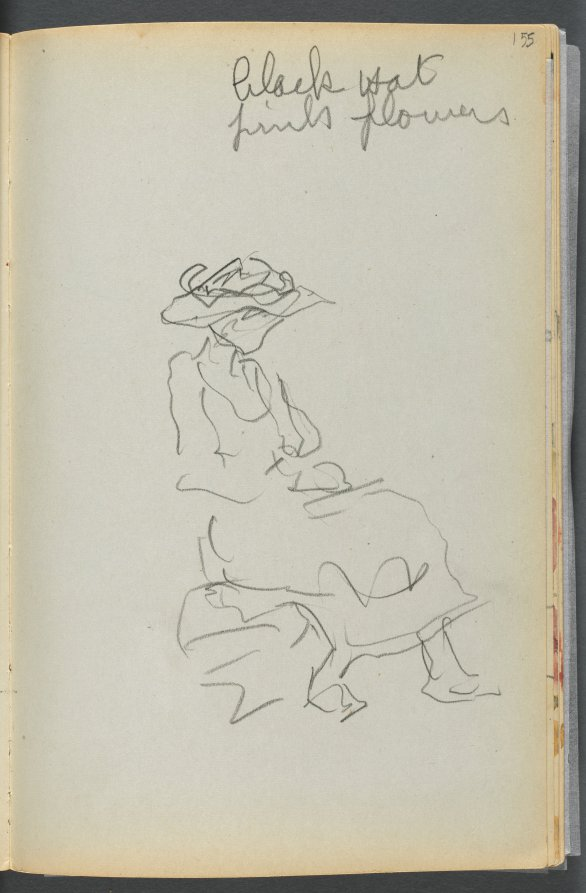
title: Sketchbook- The Granite Shore Hotel, Rockport, page 155: Seated Woman with Notes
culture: America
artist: Maurice Prendergast (American, born Newfoundland [now Canada], 1858–1924)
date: 1905–10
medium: graphite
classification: Bound Volume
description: This sketchbook contains 72 pages of pencil drawings and 9 watercolors of Cape Ann. On the inside of the cover Prendergast wrote the address of the Granite Shore Hotel in Rockport, Massachusetts.